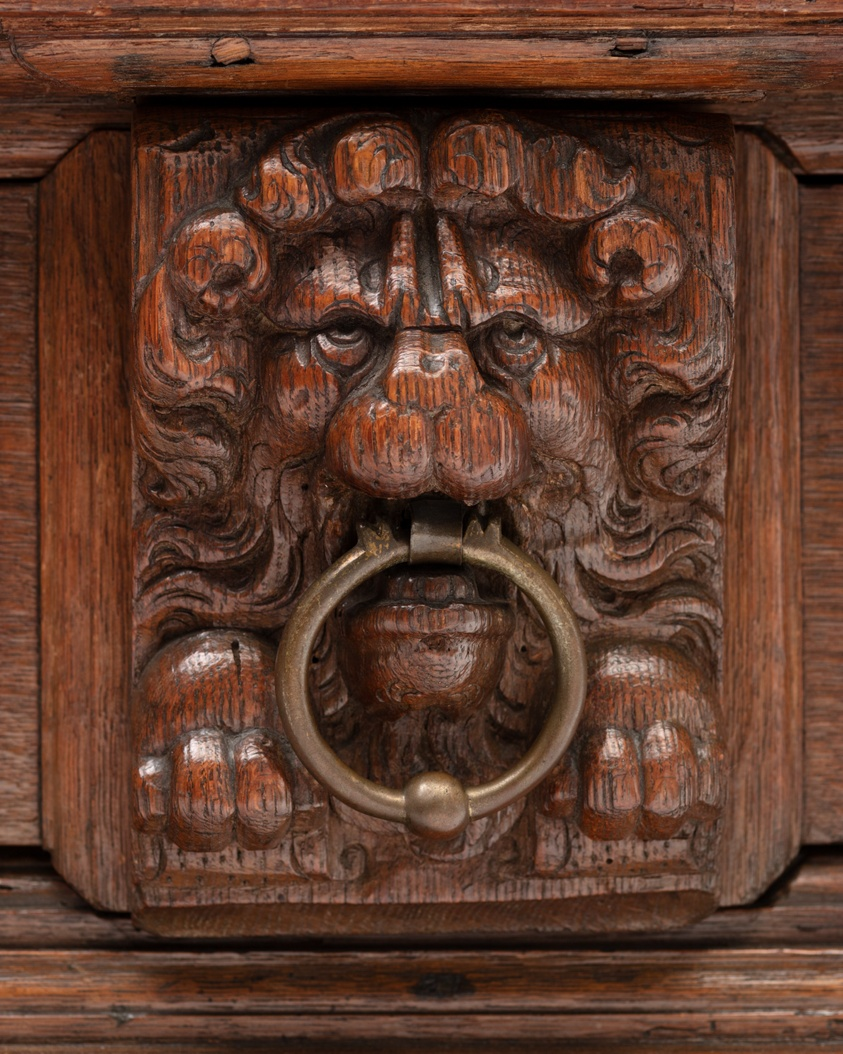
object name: Furniture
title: Linen Cupboard (Kast)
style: Baroque, Mannerism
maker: The Netherlands, probably Amsterdam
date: 1630/50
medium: Oak, pearwood, hardwood, paint, iron, and brass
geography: Netherlands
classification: furniture; decorative arts; functional object; furnishings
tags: lions, animals, architecture